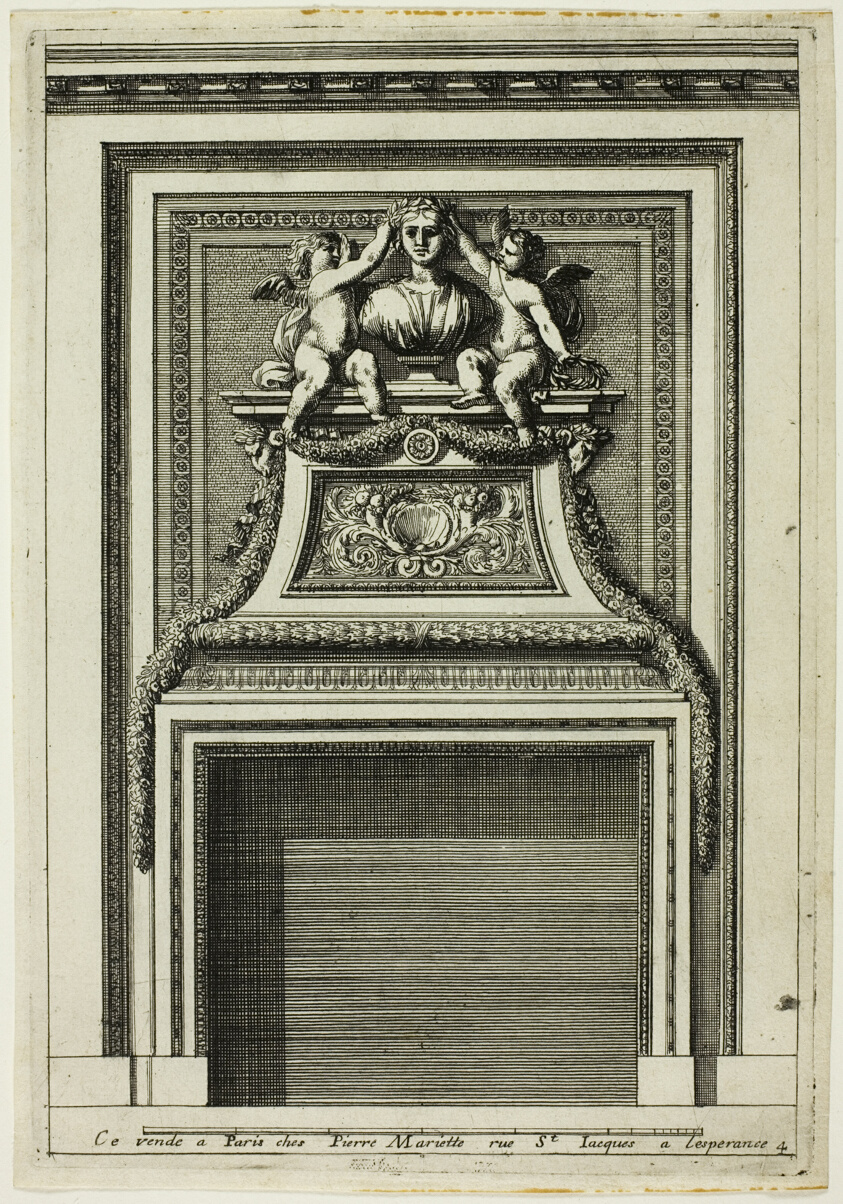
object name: Print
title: Chimneys in the Italian Manner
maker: Jean Le Pautre (French, 1618-1682)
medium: Etching on ivory laid paper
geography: France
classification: etching; print; prints and drawing